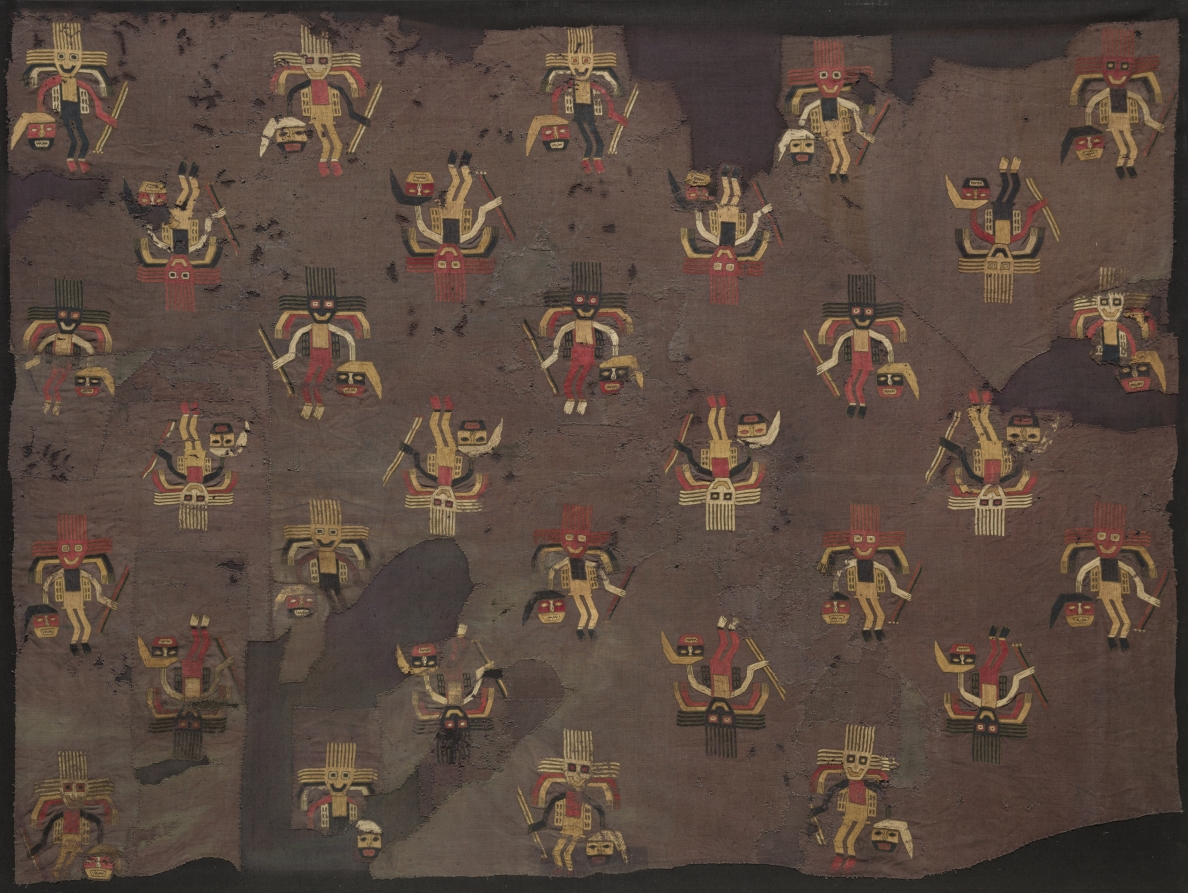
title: Fragment of Embroidered Cloth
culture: Peru, South Coast, Paracas, Late Period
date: c. 300–100 BCE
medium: embroidery on plain wool ground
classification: Textile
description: The repetition of a nonmythical figure, in this case a warrior holding spears and a trophy head, was one of the important innovations of Paracas textile design during the Late Paracas period. The trophy head cult was an essential aspect of crop fertility and was, therefore, a focal point of Paracas art in general.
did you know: Extremely dry conditions on Peru's desert coast allow for the extraordinary preservation of textiles.